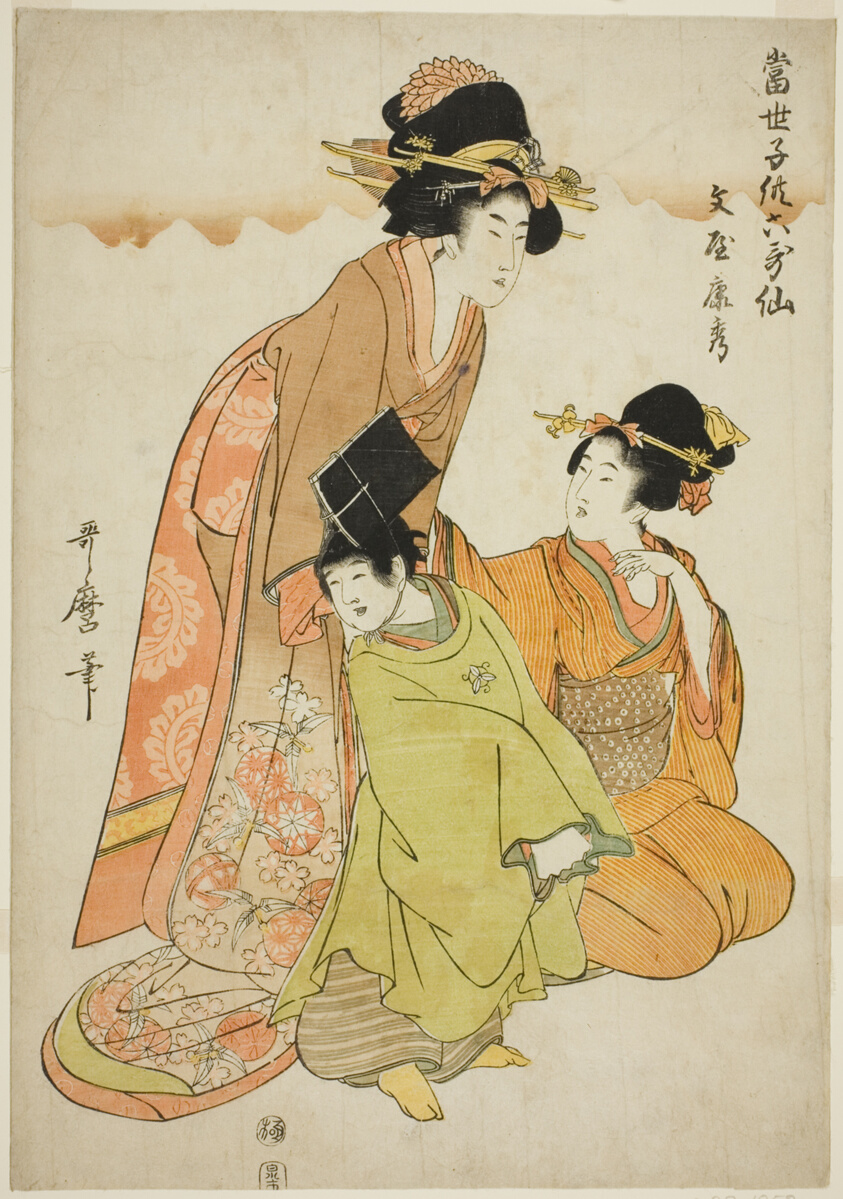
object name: Print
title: The Poet Fun'ya no Yasuhide, from the series "Modern Children as the Six Immortal Poets (Tosei kodomo rokkasen)"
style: Japanese (culture or style)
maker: Kitagawa Utamaro 喜多川 歌麿; Japanese, 1753 (?)-1806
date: c. 1804/05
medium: Color woodblock print; oban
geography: Japan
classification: woodblock print; print; asian art